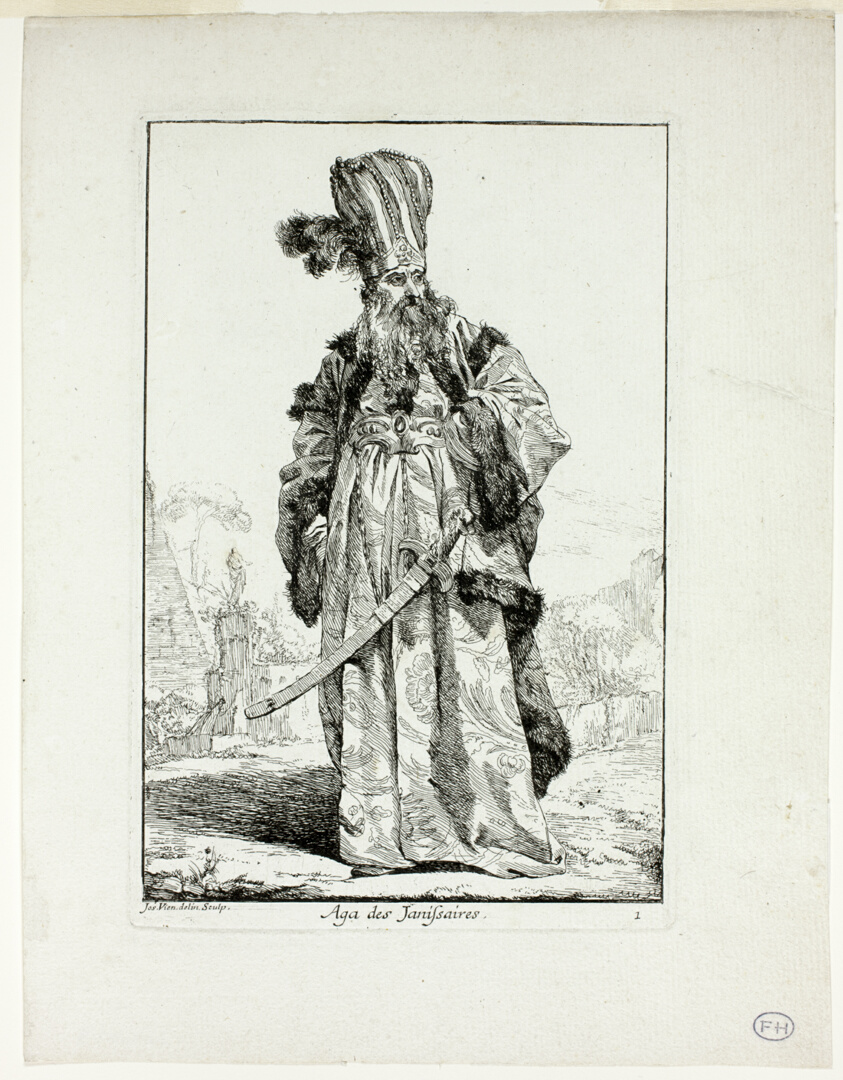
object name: Print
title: Aga des Janissaires, plate one from Caravanne du Sultan à la Mecque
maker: Joseph-Marie Vien, the elder; French, 1716–1809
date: 1748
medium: Etching on ivory laid paper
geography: France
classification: etching; paper; print; prints and drawing